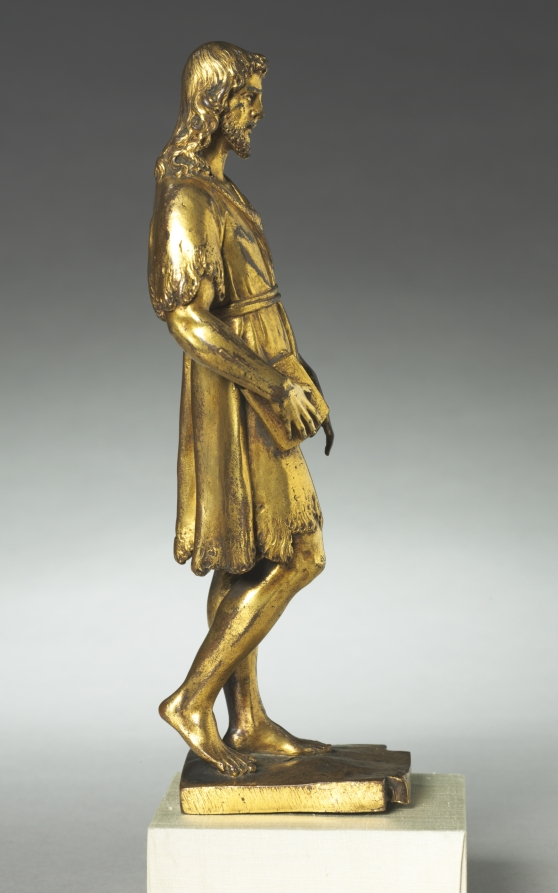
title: Saint John the Baptist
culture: Italy, Venice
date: c. 1550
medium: gilt bronze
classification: Sculpture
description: This small bronze, covered with gold, was produced in multiple versions. Saint John stands here, looking calm and composed, in a rather graceful pose. This piece has a sense of forward motion even though the figure appears to be leaning back in this stance. Elegant and subtle, this piece is a beautiful example of small cast Renaissance bronzes.